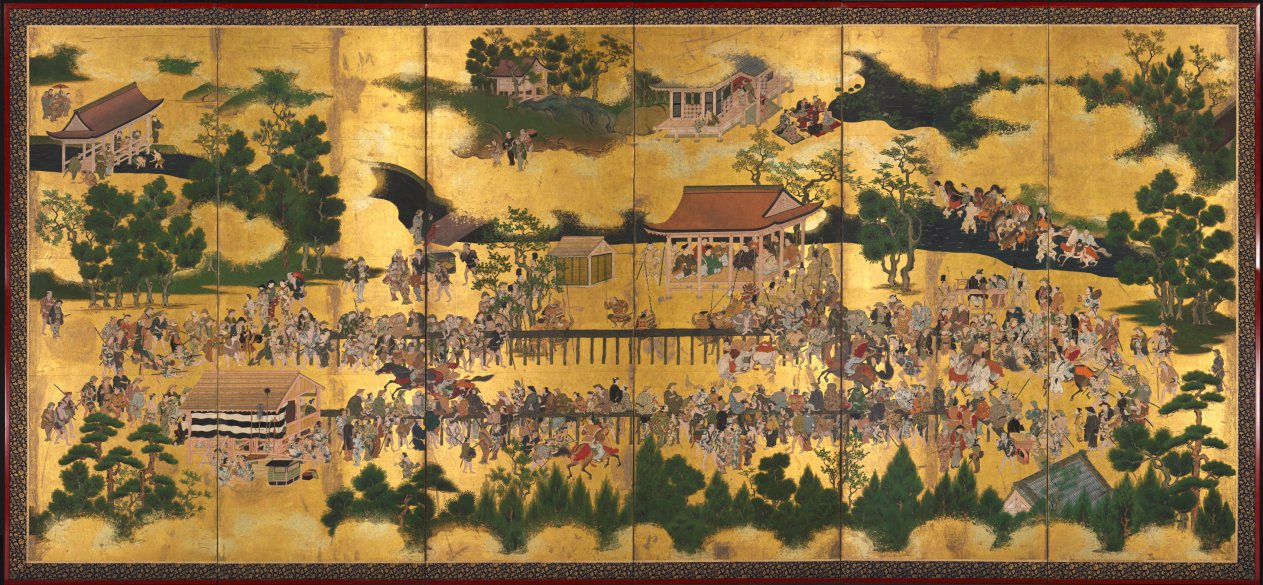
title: Horse Race at the Kamo Shrine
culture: Japan, Edo period (1615–1868)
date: early to mid-1600s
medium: One of a pair of six-panel folding screens; ink and color on gilded paper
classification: Painting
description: Kamo Shrine in Kyoto, seen in the upper half of the left screen, has held an annual horse race on May 5th since the ninth century. Serving as a snapshot of the festivities, this pair of screens captures nearly 600 people watching the race, beginning at the bottom part of the right screen and continuing to the left. The race is a great spectacle where aristocratic riders cling to their fast and unwieldy mounts. While many of those in attendance seem in rapt attention to the main event, other vignettes depict people engaged in an array of activities. This pair of screens was likely originally part of a group of linked murals.